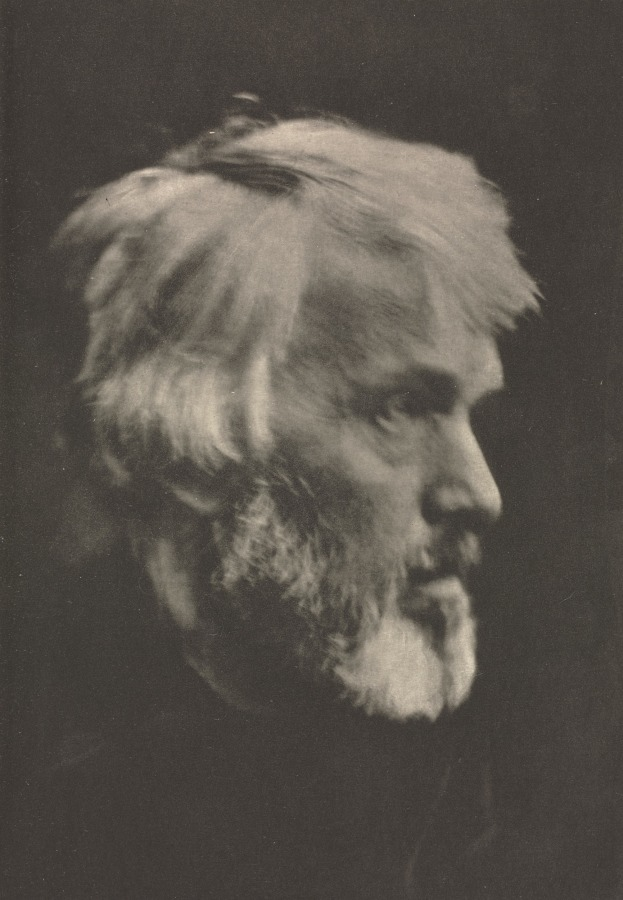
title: Camera Work: Carlyle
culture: England, 20th century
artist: Julia Margaret Cameron (British, 1815–1879)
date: 1913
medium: photogravure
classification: Bound Volume